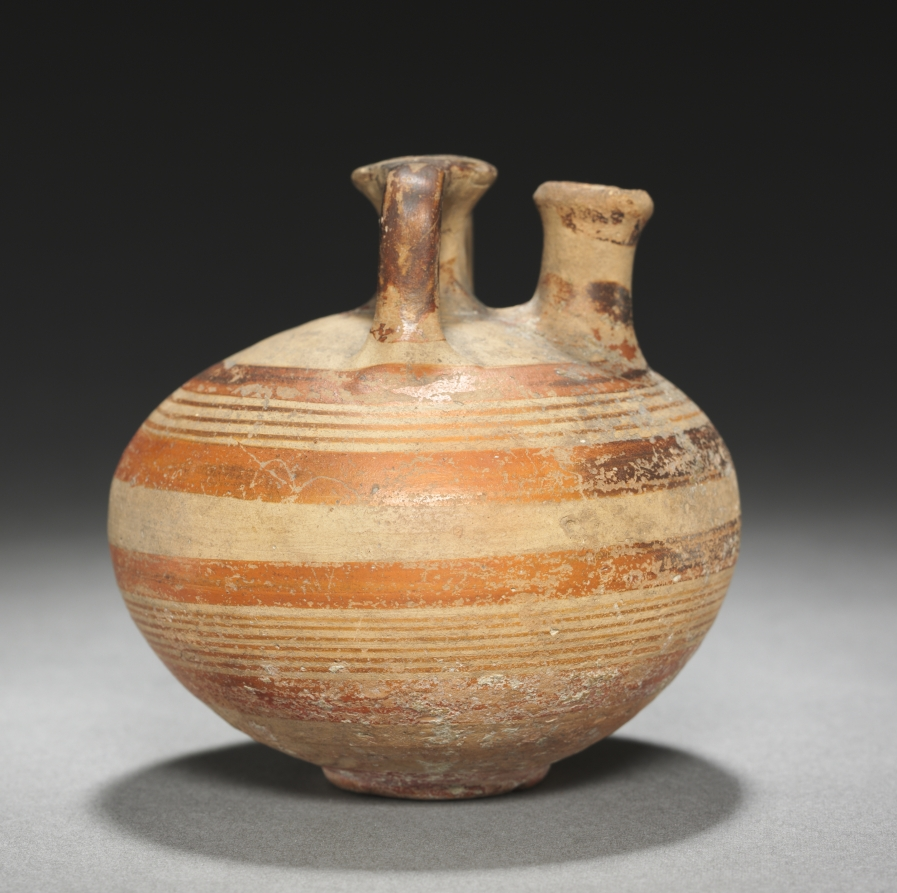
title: Miniature Stirrup Jar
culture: Cyprus, late Helladic III A2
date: c. 1350–1300 BCE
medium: Cypro-Mycenaean ware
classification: Ceramic